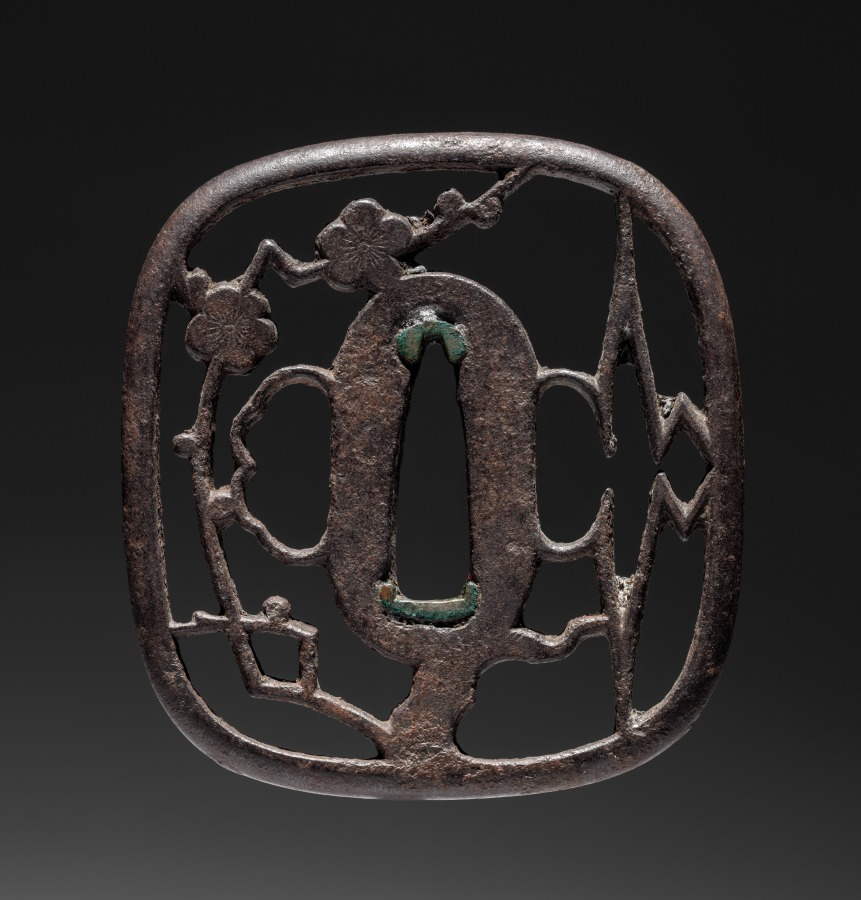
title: Sword Guard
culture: Japan, Edo period (1615–1868)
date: 1615–1868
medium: iron (Akasaka type)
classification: Arms and Armor